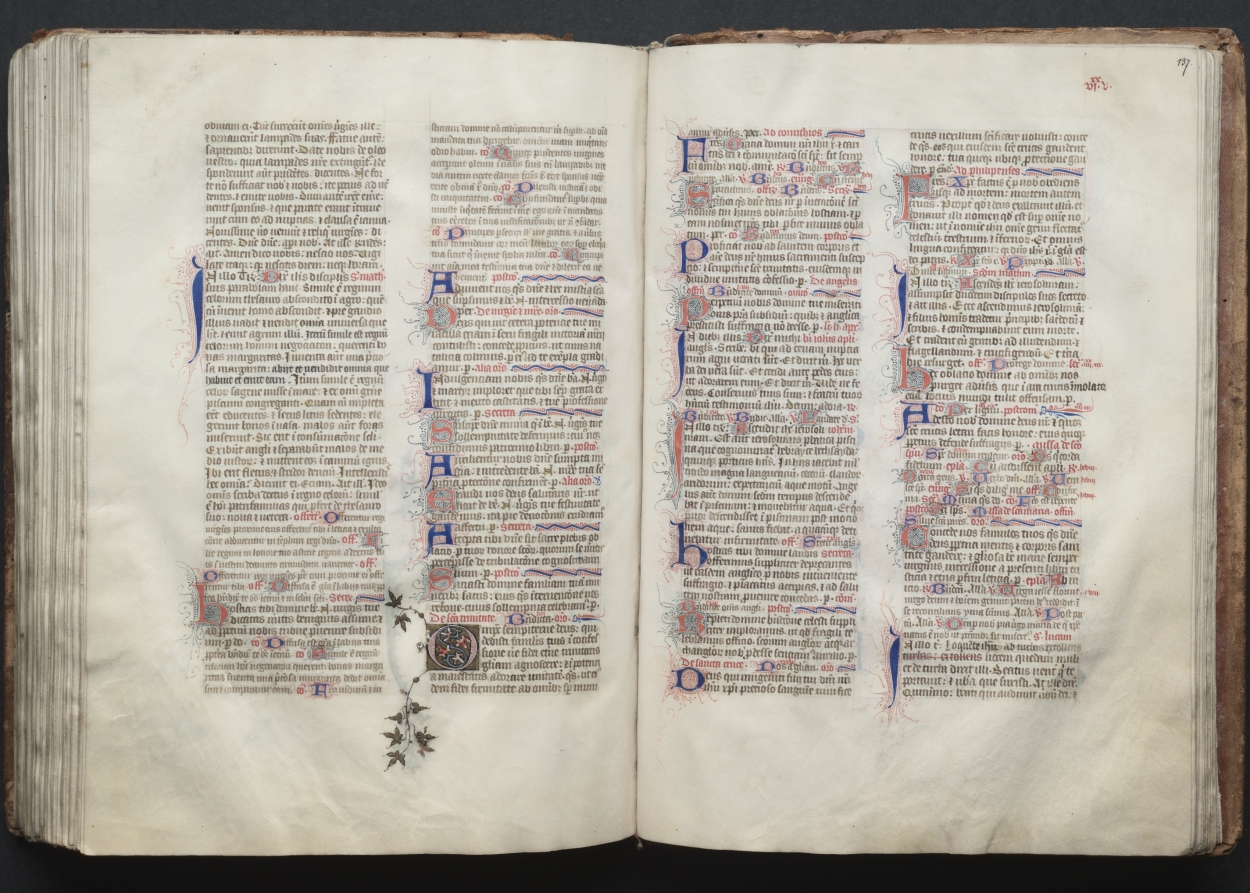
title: The Gotha Missal: Fol. 137r, Text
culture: France, Paris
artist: Master of the Boqueteaux (French)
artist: and Workshop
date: c. 1375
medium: ink, tempera, and gold on vellum; blind-tooled leather binding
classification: Bound Volume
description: The style and quality of this manuscript's decoration is typical of deluxe Parisian books made for aristocratic or royal patrons. Most of the book's decoration appears to be the work of the Master of the Boqueteaux, an artist active at the court of King Charles V (died 1380). His style was apparently shared by a number of book illuminators working in and around Paris. It is very possible that the Gotha Missal belonged to Charles V, but is not provable because the manuscript has no royal portraits and lacks a colophon. Given the book's magnificent decoration, however, it would seem that it was produced for a Valois prince, if not for the king himself. The manuscript receives its name from the German dukes of Gotha, its later owners.